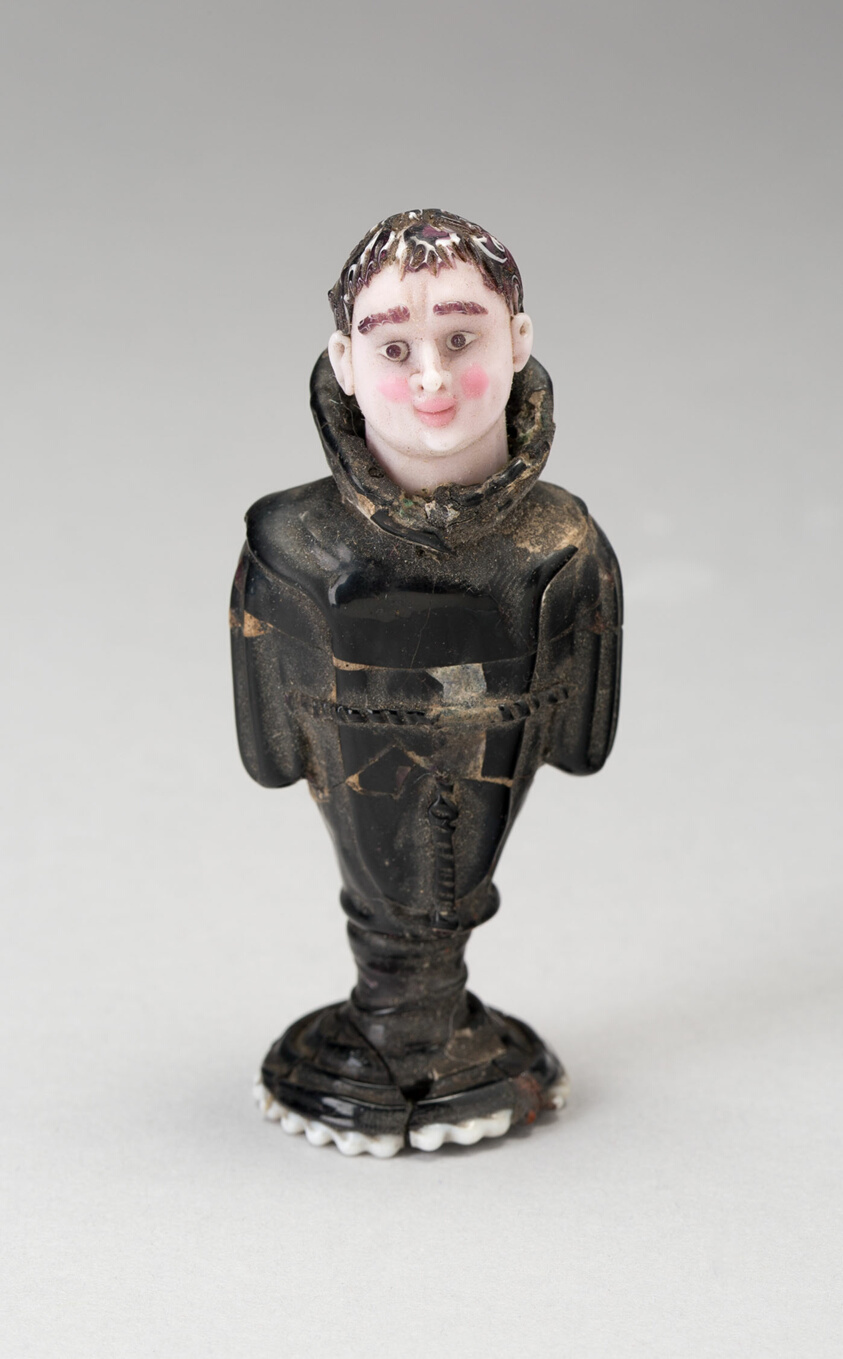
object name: Glass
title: Bust of a Cleric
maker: Nevers, France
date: 18th century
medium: Glass; lampwork (verre de Nevers), metal armature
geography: France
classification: decorative object/ornament; lampwork; glass; european decorative arts